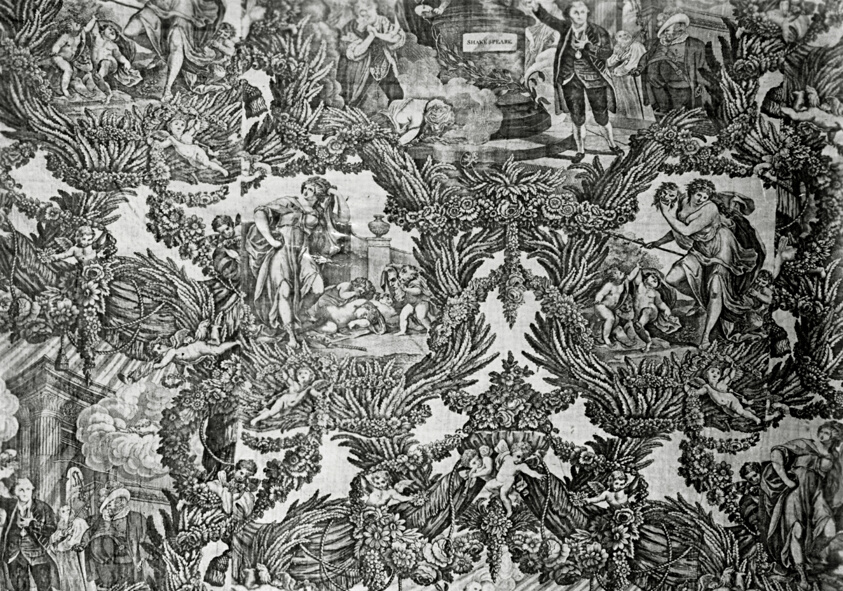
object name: Textile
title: Garrick and Shakespeare with Tragedy and Comedy (Furnishing Fabric)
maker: After a painting by Robert Edge Pine (English, c. 1730–1788); Engraved by Caroline Watson (English, 1760–1814); England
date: c. 1790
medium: Cotton, plain weave; engraved roller printed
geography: England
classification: textile; weaving - printed; furnishing textile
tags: propaganda